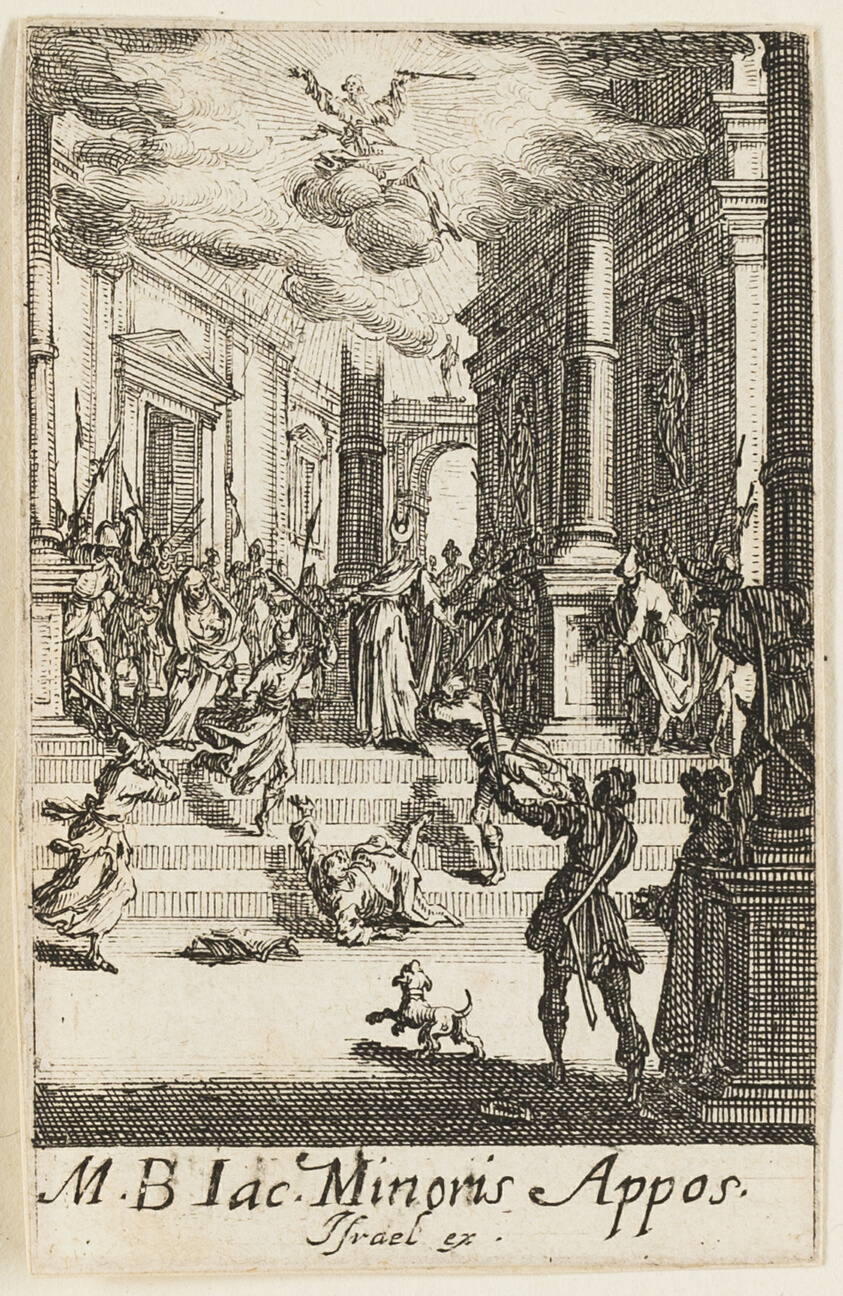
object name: Print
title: Martyrdom of Saint John, the Minor, plate seven from The Martyrdoms of the Apostles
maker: Jacques Callot (French, 1592-1635)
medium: Etching on paper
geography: France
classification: etching; print; prints and drawing